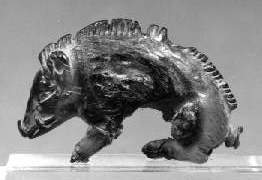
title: Pendant in the Form of a Boar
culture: Etruscan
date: 400s BCE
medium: amber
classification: Jewelry